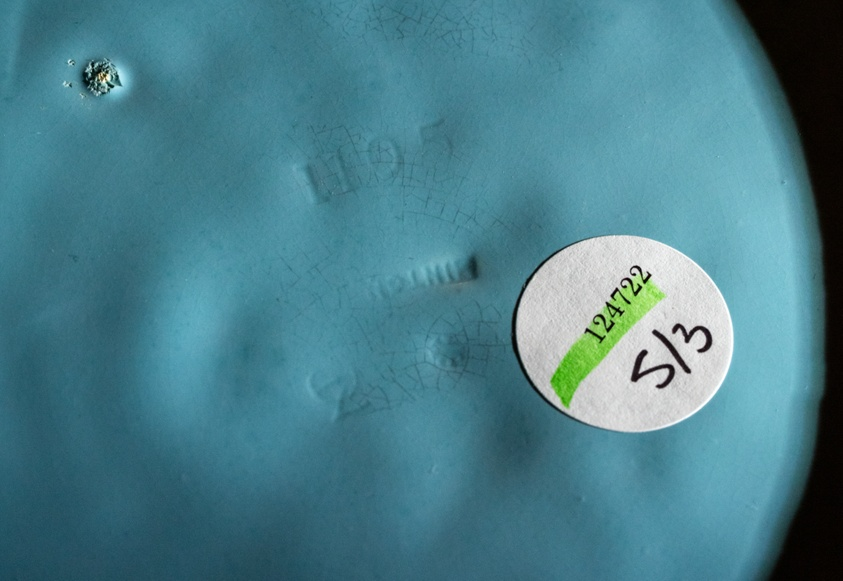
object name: Ceramics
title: Shakespeare Ewer and Basin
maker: Minton Pottery and Porcelain Factory; Stoke-on-Trent, England, founded 1793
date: Ewer: 1873, Basin: 1871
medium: Tin glazed earthenware with pewter mounts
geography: England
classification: ceramics